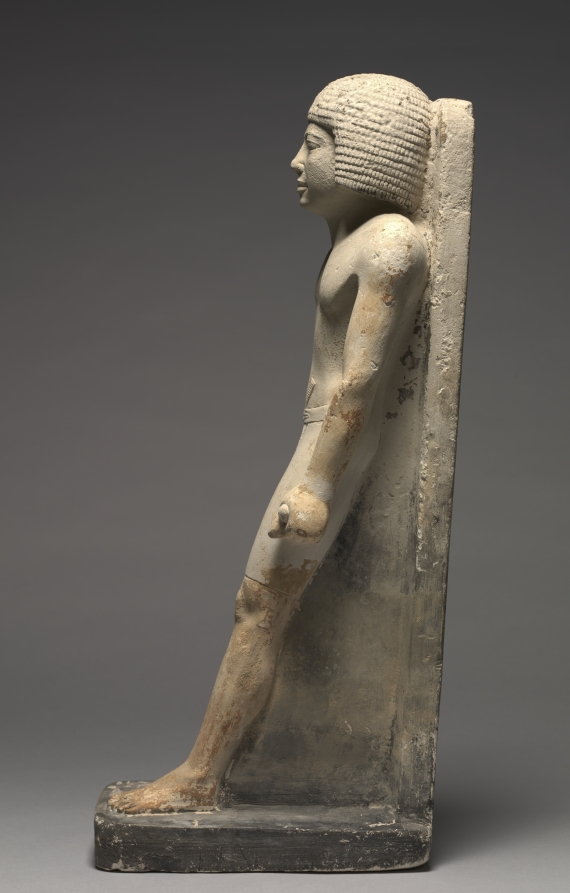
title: Striding Statue of Minnefer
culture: Egypt, Giza, Old Kingdom (2647–2124 BCE), Dynasty 5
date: c. 2377–2311 BCE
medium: painted limestone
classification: Sculpture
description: The base of this statue is inscribed with the name and title of the supervisor of palace attendants, Minnefer. He is represented as young and athletic, hands at his sides and left foot forward, the typical striding pose for male figures. To make the statue more lifelike, the flesh areas were originally painted reddish brown, the wig black, and the kilt white. This was one of four statues of Minnefer that were found in the serdab (sealed statue chamber) of his ruined mastaba (tomb) in the cemetery west of the Great Pyramid at Giza. Most Old Kingdom private statues were concealed in this way. The statue was regarded as more than just a representation. Once the proper rites had been performed, it functioned as a substitute for the deceased individual and could partake of food offerings necessary for the survival of his ka, or vital spirit.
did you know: In the Old Kingdom, wigs like the one Minnefer wears here were used to demonstrate higher social status.